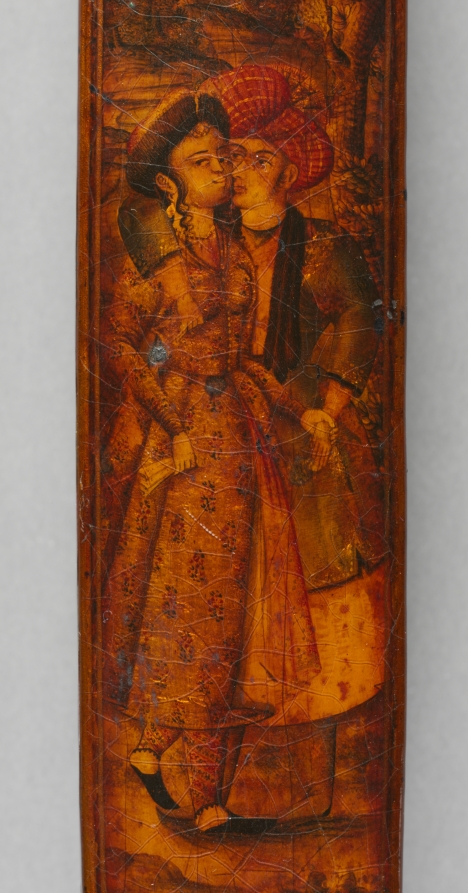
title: Pen and Ink Box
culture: Iran, probably Isfahan, Safavid period (1501–1722)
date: 1667–98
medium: Varnished lacquer and opaque watercolor over papier-mâché, ink, and copper alloy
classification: Lacquer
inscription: 1109